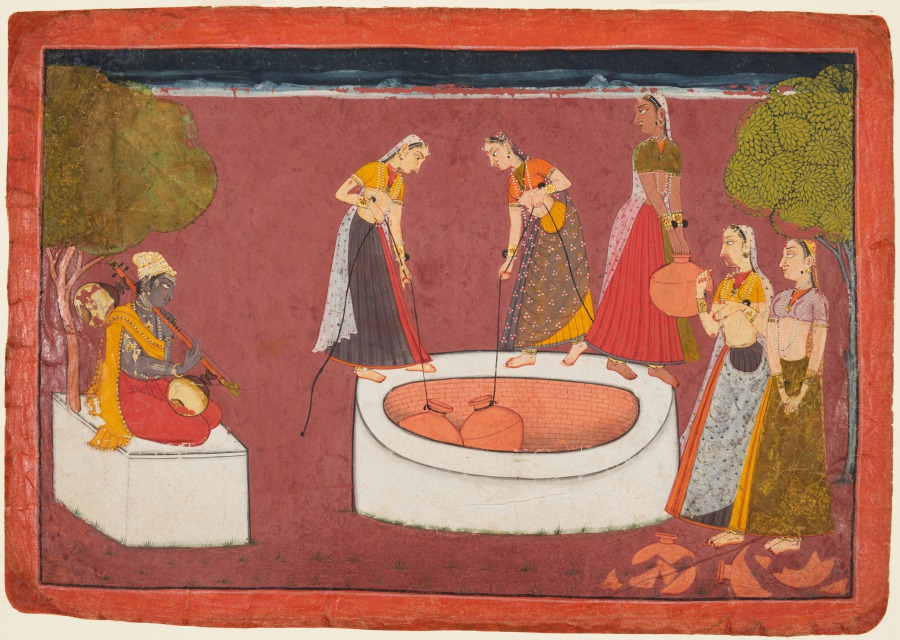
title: Madhava plays his vina before five women drawing water from a well, folio 3 from a Madhavanala-Kamakandala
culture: Northern India, Pahari kingdoms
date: c. 1720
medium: gum tempera and gold on paper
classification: Painting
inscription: Takri number: 3; four lines of Takri script; (in English) Roman numeral: X -K. Iswari Singh of Sirmur; number 188. caupai. calio kataka kāmavatī desā. dharati dhase bhāra sahe na sesā. jā dīna gayī to peyano kāī. dāsa kayi digapatī baraharaī. tarī kī khurī so kheī udāī. dharatī suraga eka ho jāī. jīha rājā ki sima jaī. le gaja danda milāī so āī. mādhavanala āge kar līā. jīhī eha prema pasarā kiyā. dohā. rājā bīkramaseṃna valī uhane sāna bajāe. kāmavatī ke nīkata īha nadī taṭa utari jvāe.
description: One morning, Madhava sits beneath a tree to play his vina (stringed instrument). At this hour, women come to a well to draw water. Time unfolds across the figures of the five women. Two pull their full water pots from the well. One stops abruptly, hearing his musical strains. Two have become so entranced that they drop and break their pots in surprise and listen with delight.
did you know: The vina is an Indian stringed instrument with gourd attached on each end as a resonator.